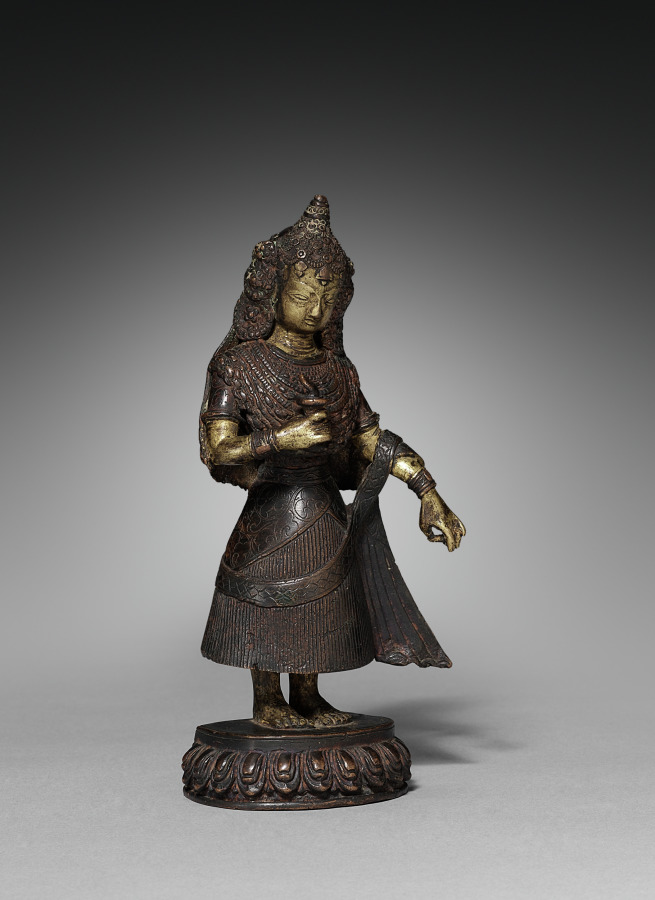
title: Royal Female Donor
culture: Nepal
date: c. 1500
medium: bronze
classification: Sculpture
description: Carrying a lamp in one hand, this female figure draped in finery was probably included as the donor of a sculptural group. She wears a complex headdress consisting of a network of beads and plaques joined together, ending in a bell at her forehead and crowning a long cloth that reaches to her waist. Her position on a lotus flower may indicate the transcendent state she attained as a result of the karmic merit of her donation.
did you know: The pleated skirt tied with a scarf around her waist is characteristic of Nepal.